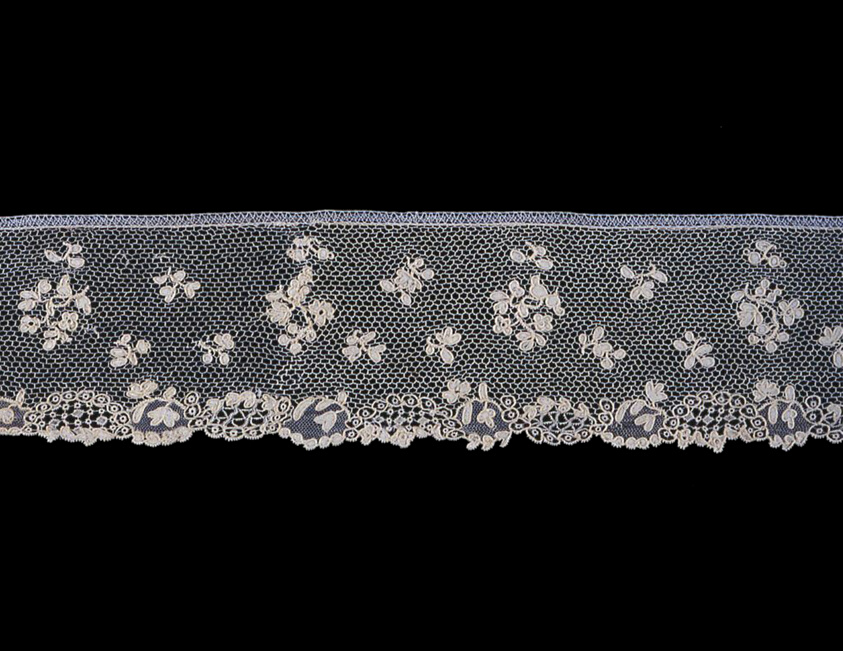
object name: Textile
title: Border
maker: France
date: 1775/1800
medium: Linen, needle lace of a type known as "Point d'Argentan" with buttonholed mesh ground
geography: France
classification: textile; lace - needle